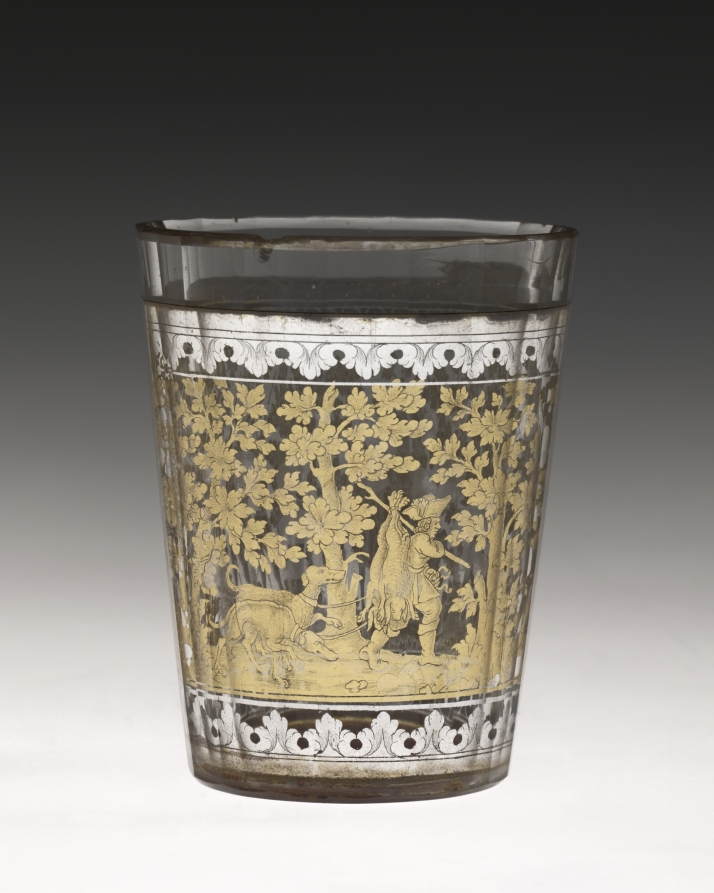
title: Tumbler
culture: Bohemia, 18th century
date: c. 1730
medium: zwischengoldglas (glass)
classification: Glass